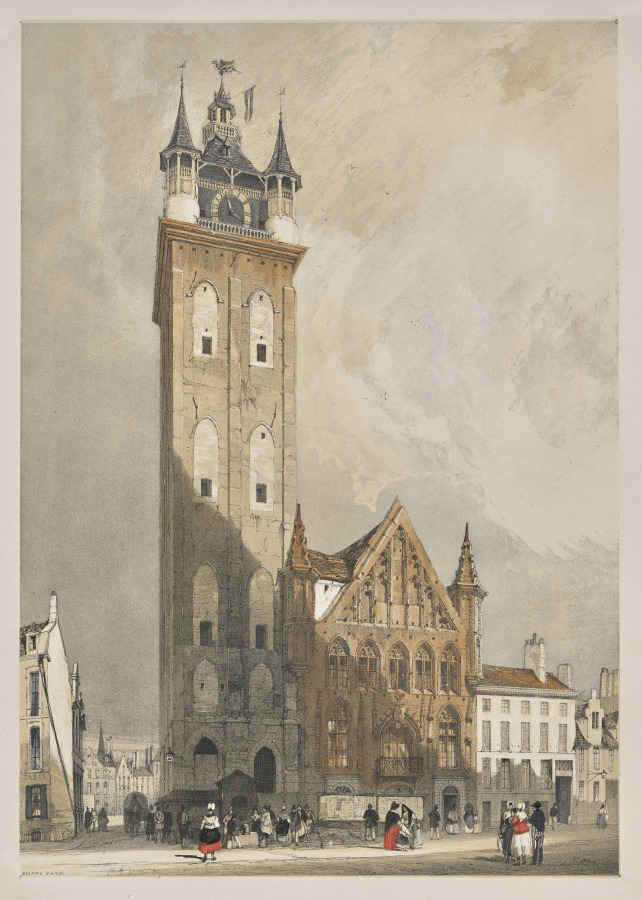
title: Picturesque Architecture in Paris, Ghent, Antwerp, Rouen: Belfrey, Ghent, Belgium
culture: England, 19th century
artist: Thomas Shotter Boys (British, 1803–1874)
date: 1839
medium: lithograph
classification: Portfolio